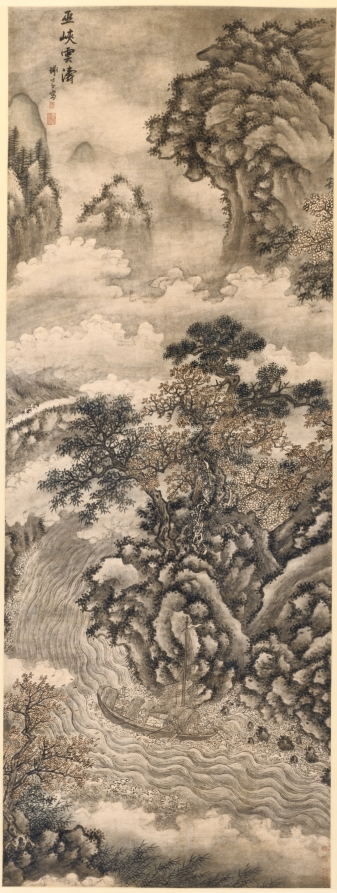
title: Clouds and Waves at the Wu Gorge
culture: China, Ming dynasty (1368–1644)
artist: Xie Shichen (Chinese, 1487–after 1567)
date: c. 1547–67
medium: hanging scroll; ink and light color on paper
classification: Painting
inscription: "巫峽雲濤" 謝時臣寫 [印] 姑蘇台下逸人; 樗仙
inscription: 5 additional seals of Cheng Qi 程琦 (1911–1988).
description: This dramatic landscape was probably painted after Xie Shichen returned from a journey in 1547 that took him through various provinces of China, including Sichuan Province in southwest China and sailing the Yangzi River. The composition from a high vantage point offers a view deep into the Wu Gorge where rolling waves put a ship in peril. The scale and composition of this landscape, which was inspired by the majestic mountain scenery in Sichuan Province, as well as Xie’s vigorous brushwork, are exceptional.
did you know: This large painting was likely created for a wealthy or powerful family's grand hall to impress their visitors.